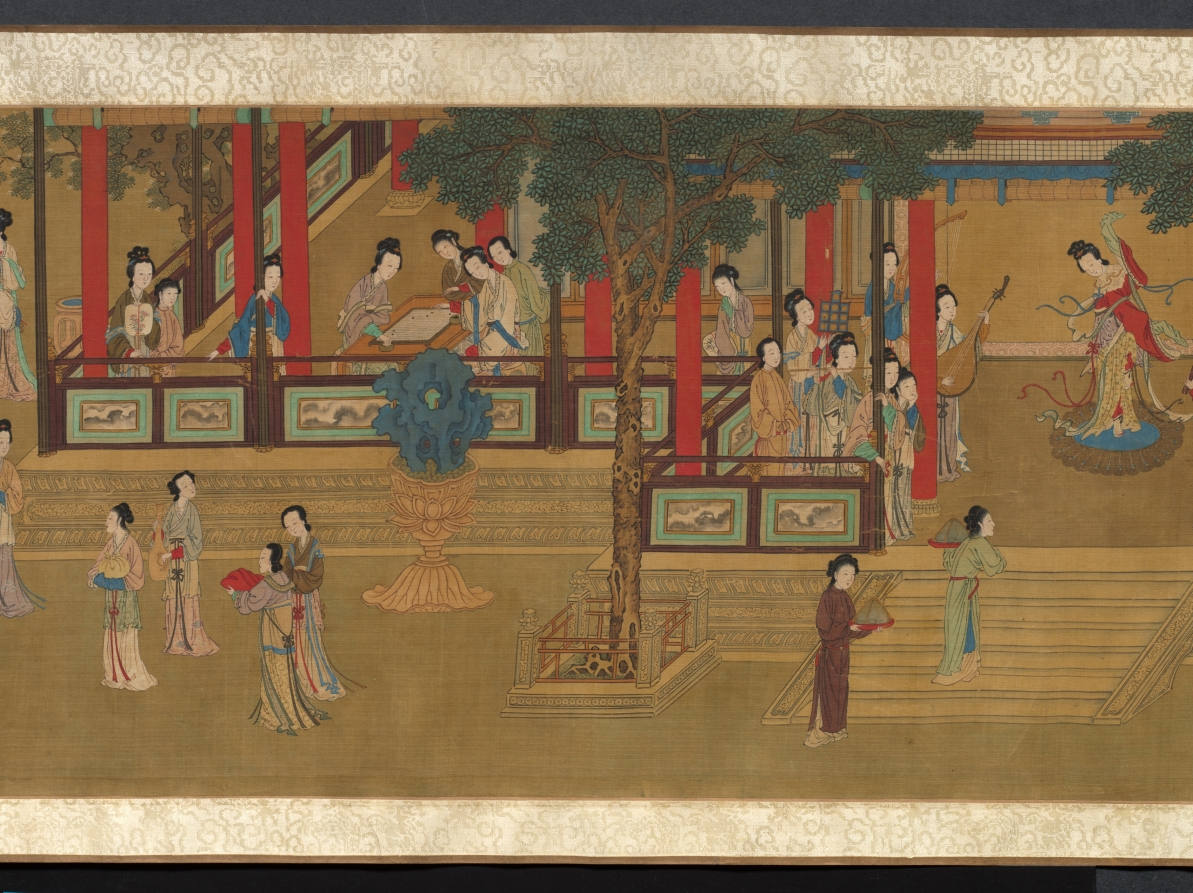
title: Palace Ladies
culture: China, Qing dynasty (1644-1911)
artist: copy after Qiu Ying (Chinese, 1494–1552)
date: 1644–1911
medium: handscroll, ink and color on silk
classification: Painting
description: This handscroll illustrates the pursuits of court ladies in a palace precinct on a spring day. Women, young girls, and their maids amuse themselves by sitting on a swing, playing games, watering and admiring peonies, performing music together, playing the qin (zither), feeding a parrot on the balustrade and fish in the water, or catching butterflies. The life of elite women was mostly restricted to the so-called inner quarters, meaning the garden and inner courts of the house. This painting idealizes the world of young palace girls that in fact was often filled with boredom and waiting for a lover.